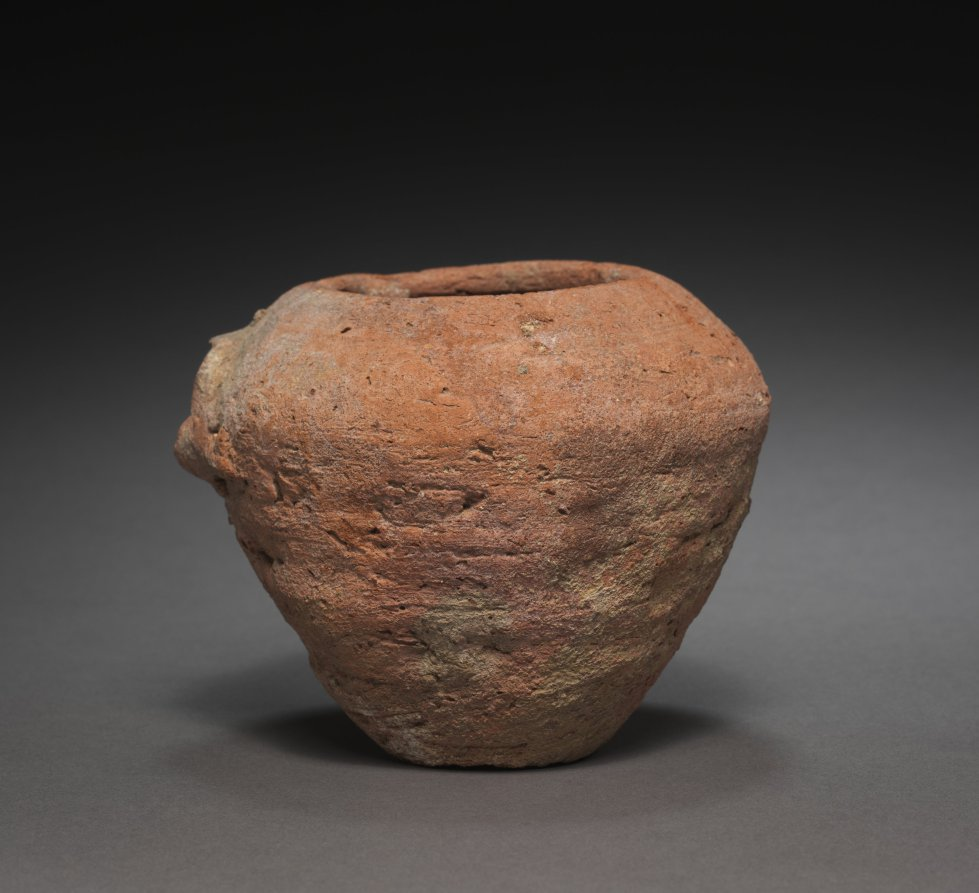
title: Spouted Jar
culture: Egypt, Middle Kingdom (2040–1648 BCE)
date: 2040–1648 BCE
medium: Nile silt ware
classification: Vessels